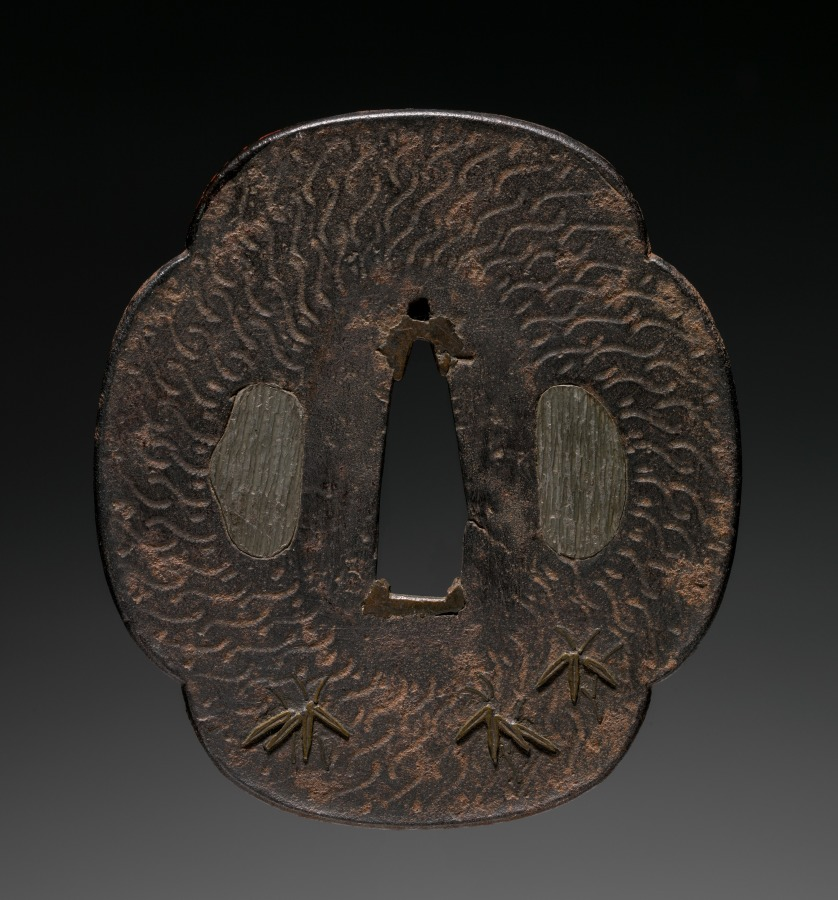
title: Sword Guard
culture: Japan, Edo period (1615–1868)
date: early to mid-1800s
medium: iron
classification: Arms and Armor